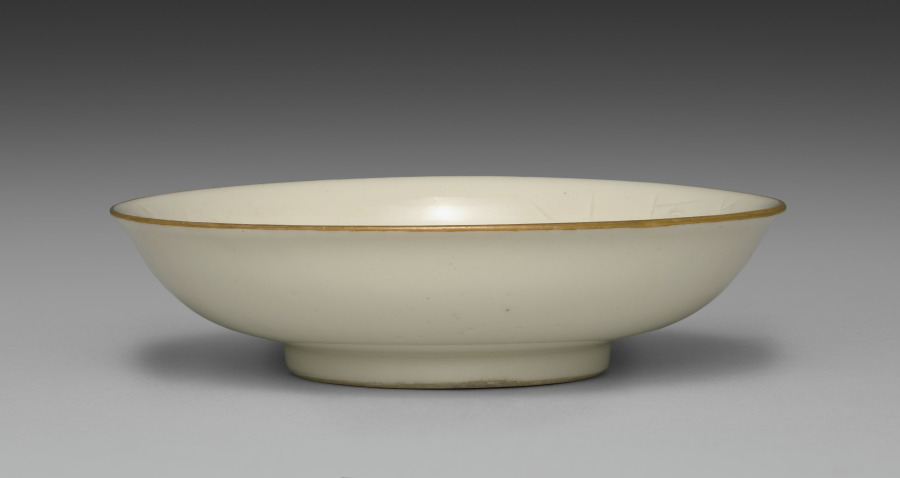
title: Small Dish from Dining Set with Plum Blossoms and Cracked-Ice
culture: Japan, Meiji period (1868–1912)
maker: Seifū Yohei II (Japanese, 1844–1878)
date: c. 1875–78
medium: Porcelain with molded designs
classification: Ceramic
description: Each item in this set has a delicate low-relief design of flowering plum branches over scattered, intersecting lines meant to resemble the cracked-ice surface of a frozen body of water and is signed on the base in gold pigment. While Yohei II produced many fine works in underglaze blue, like those produced by Kiyomizu Shichibei, he also made works in quite different styles later in his career, from the early 1870 s. In 1873, he was appointed purveyor to the Industrial Center of Kyoto Prefecture, a designation associated with Kyoto’s efforts to reach an international market through the port of Kobe; and from 1875 until his death, he was involved in national-level projects to present Japanese ceramics across the world. It was during this period that Yohei III was apprenticed to Yohei II, and it has been suggested that this set may in fact be an early example of Yohei III’s work, which he signed with his teacher’s name. Decorated with flowers resembling Japanese textile motifs, the set calls to mind the design of Yohei II’s pair of vases with plum blossoms in the Victoria and Albert Museum. Here, the elaborate trees created for a formal public exhibition setting have been translated into the approachable blossoms of the genteel domestic environment. While the designs are consistent across the pieces, each raised flower petal and pistil and each incised line in the ice was done by hand, so the cups, bowls, and dishes are similar yet unique. The bottoms of two boxes once identified the set’s owner, but the information has been deliberately obscured with black ink. However, inscriptions still visible appear to indicate two occasions, once at the end of July 1886 , and once again in June 1916 , when parts of the set were requested from Hokura in Niigata Prefecture. The location corresponds to a neighborhood in the present-day city of Jōetsu. The surname Tsuji 辻 also appears on a paper tag affixed to one of the box cloths. Future research may possibly reveal more about their provenance. A vase by Yohei III in a private collection combines the formal grandeur of the Yohei II vases in the Victoria and Albert Museum with the gentler design of this dining set, placing flowering plum trees against soft, scalloped-edge clouds resembling those in golden screens.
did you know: The dining wares have a creamy white coloration that the four boxes containing them identify as Korean in style.